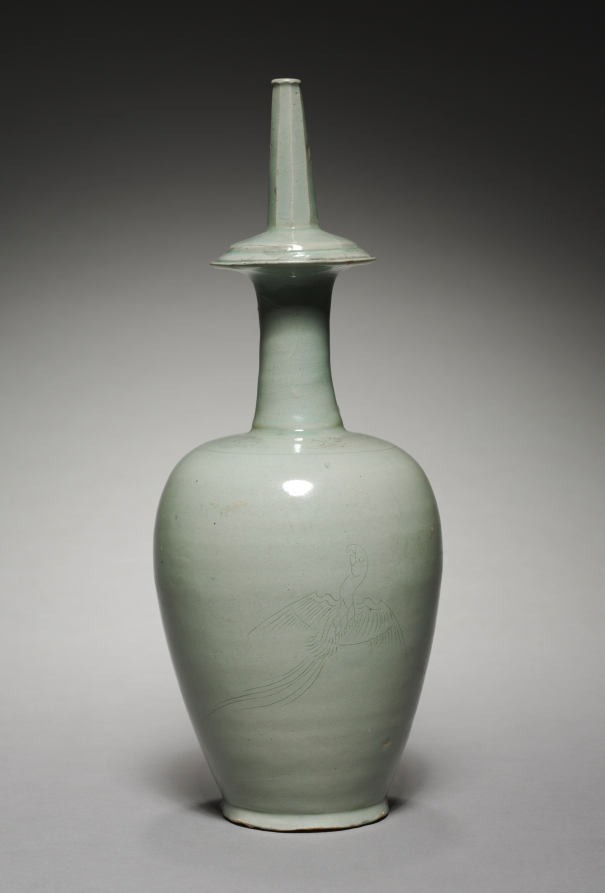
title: Water Ewer for Rituals (Kundika) with Incised Parrot Design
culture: Korea, Goryeo dynasty (918–1392)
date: 1100s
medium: stoneware with celadon glaze, incised and carved decoration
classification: Ceramic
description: This distinctively shaped celadon vessel is a kundika. With a spout on one side, this type of vessel is often used in Buddhist purification rituals. Unlike most existing examples that have an image of a willow tree, this work has a rare flying phoenix design incised on its surface. During the Goryeo period (918-1392), about 260 kilns operated in mainly Jeolla and Chungcheong provinces, meeting a soaring demand for high-end products like this example.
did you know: Unlike most existing examples that have an image of a willow tree or lotus pond, this ewer bears an image of flying parrots delicately incised on its surface.